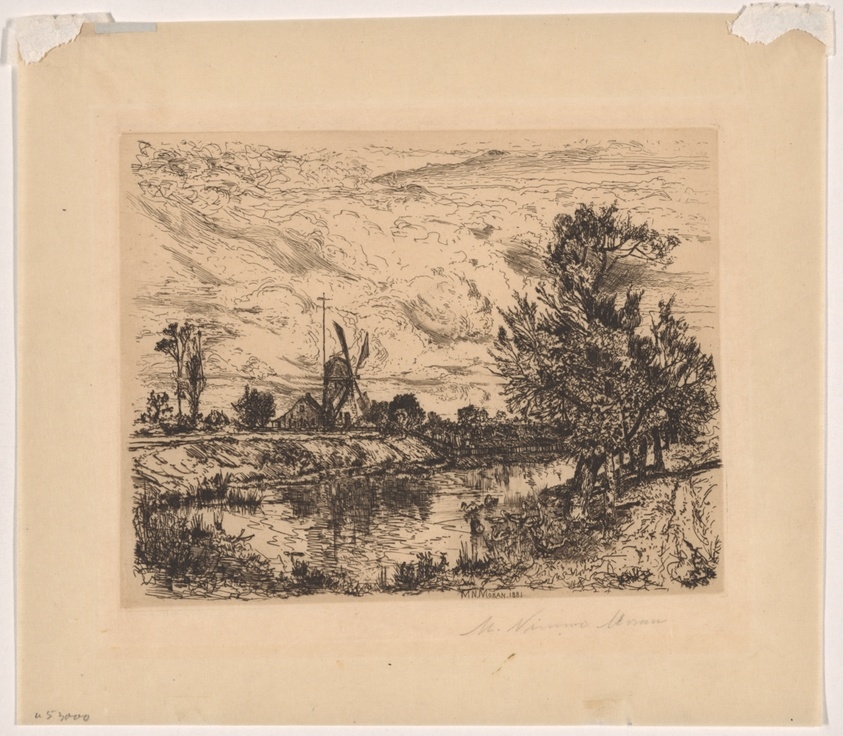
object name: Print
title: The Goose Pond, East Hampton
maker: Mary Nimmo Moran (American, 1842-1889?)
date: 1881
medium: Etching in black on cream Japanese paper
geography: United States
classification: prints and drawing; paper; print; etching